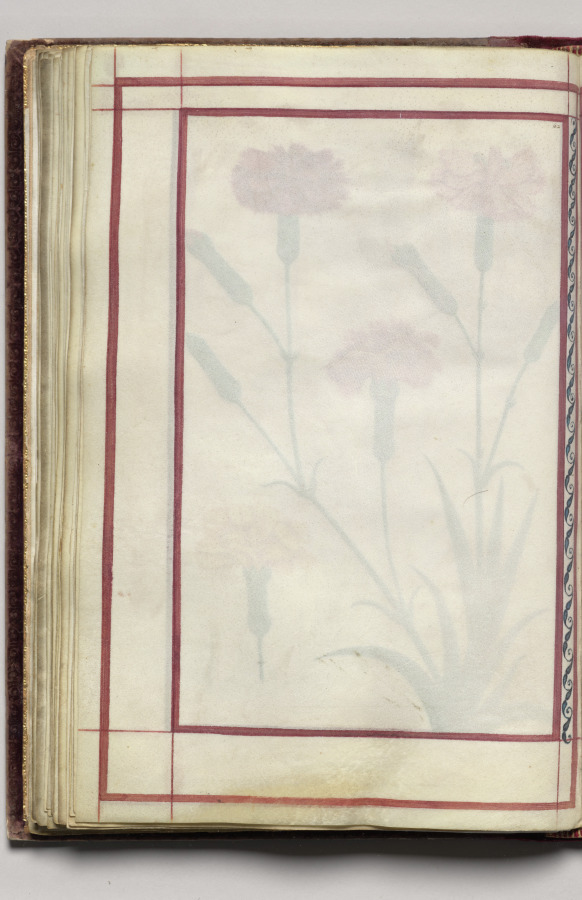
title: Border, folio 31 (verso), from Florilegium (A Book of Flower Studies)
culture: France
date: 1608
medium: watercolor, ink, silver and gold over occasional traces of pencil, on vellum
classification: Bound Volume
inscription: Dated: Poitiers 1608 (on frontispiece) Signed: On frontispiece in black ink, lower right: Van Kuyk Notation on drawing: Frontispiece: in pencil, lower margin: * élève de Van Kessel, peintre flammand (* in pencil also appears in front of Van Kuyk's name).